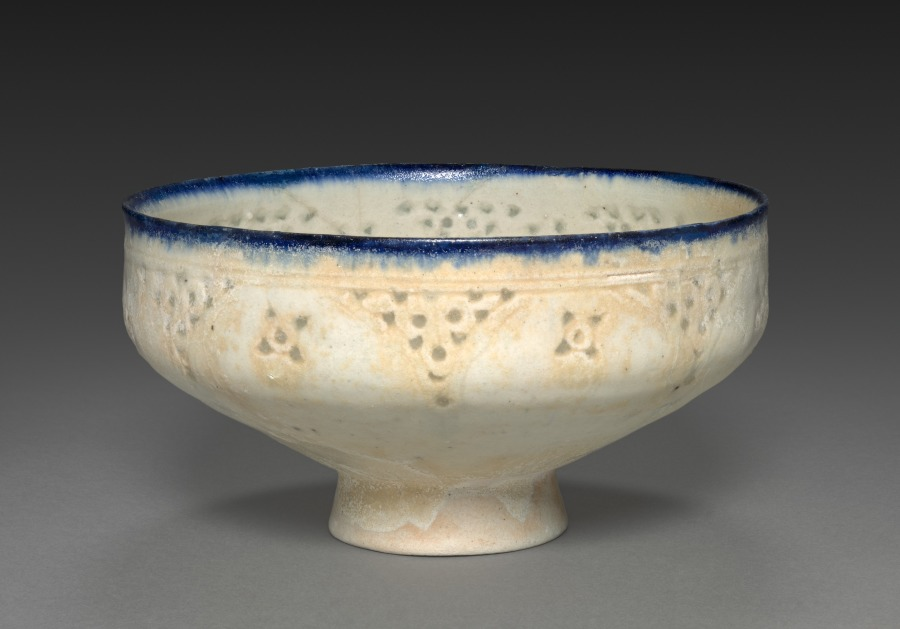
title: Footed Bowl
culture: Iran, probably Kashan, Seljuq period, late 12-early 13th century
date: late 1100s–early 1200s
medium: fritware, pierced and underglaze painting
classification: Ceramic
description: Iranian potters created transparency by piercing and glazing frit-body walls. Here, triangles and rosettes decorate incised scallops beneath the blue rim. The footed shape is derived from Iranian metal bowls.